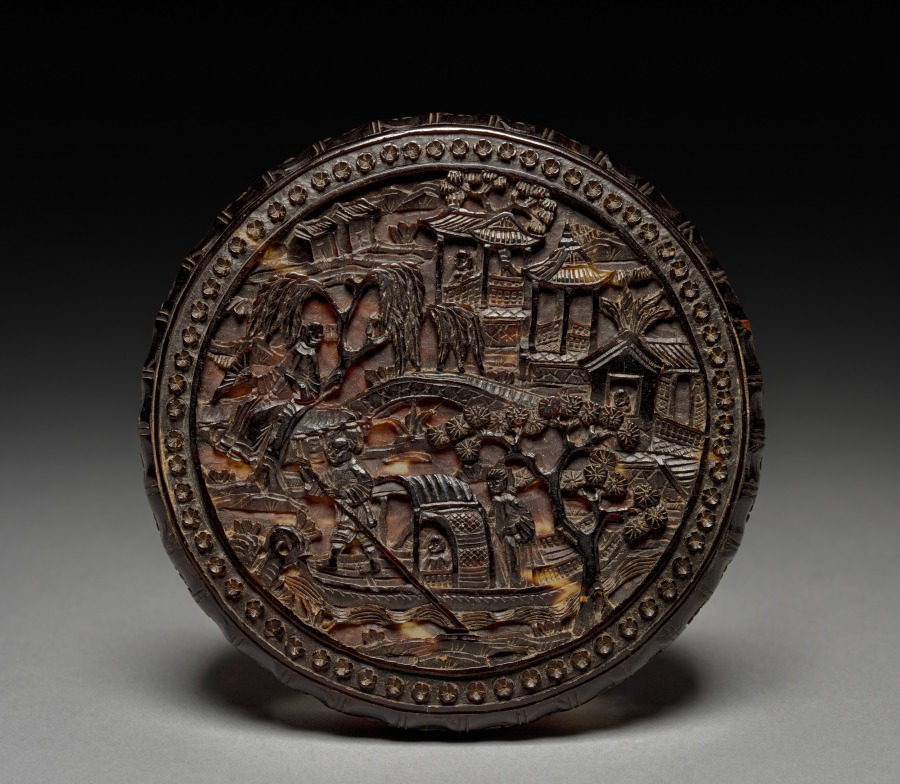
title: Fragrance Box (lid)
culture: China, Qing dynasty (1644-1911)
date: 1700s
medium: tortoiseshell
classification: Miscellaneous